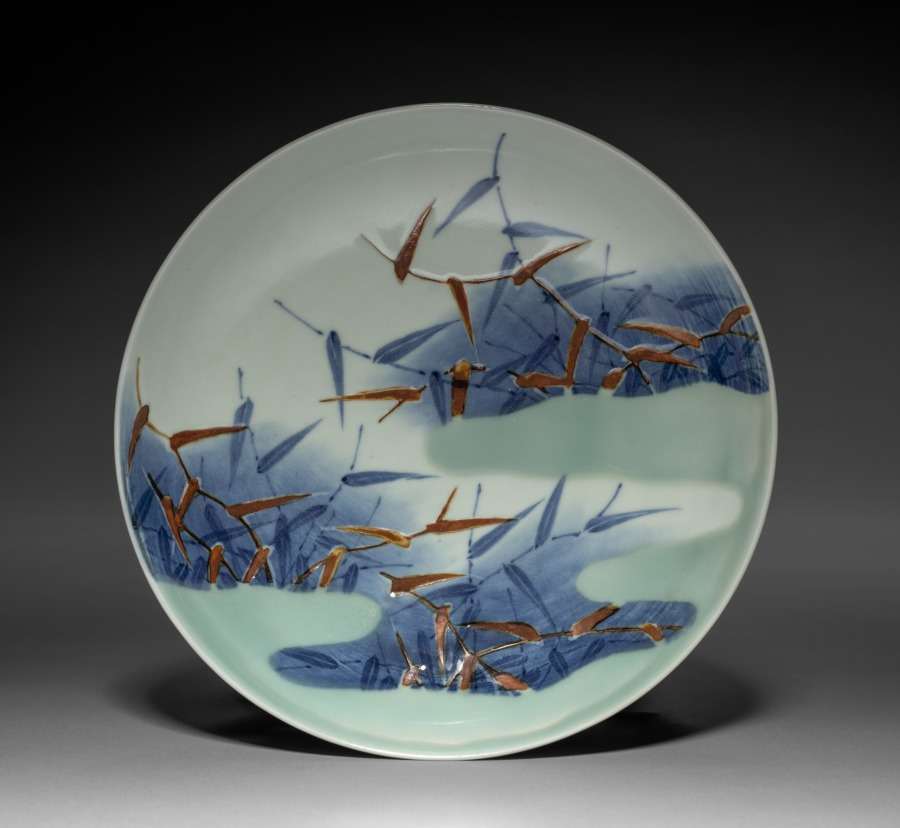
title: Dish with Reeds and Mist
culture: Japan, Edo period (1615–1868)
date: c. 1700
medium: Porcelain with underglaze blue and overglaze color enamel (Hizen ware, Nabeshima type)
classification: Ceramic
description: The interior of this dish features clusters of reeds emerging from mist. The gradation of blue wash in the background suggests that the scene is set by still waters, perhaps the banks of a river or edge of a marsh. The celadon, or pale green glaze, evocative of mist or fog, contrasts visually with the reeds and water.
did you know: Nabeshima dishes were produced in standard sizes of three, five, and seven sun (a traditional measurement of around 3 cm) in diameter.